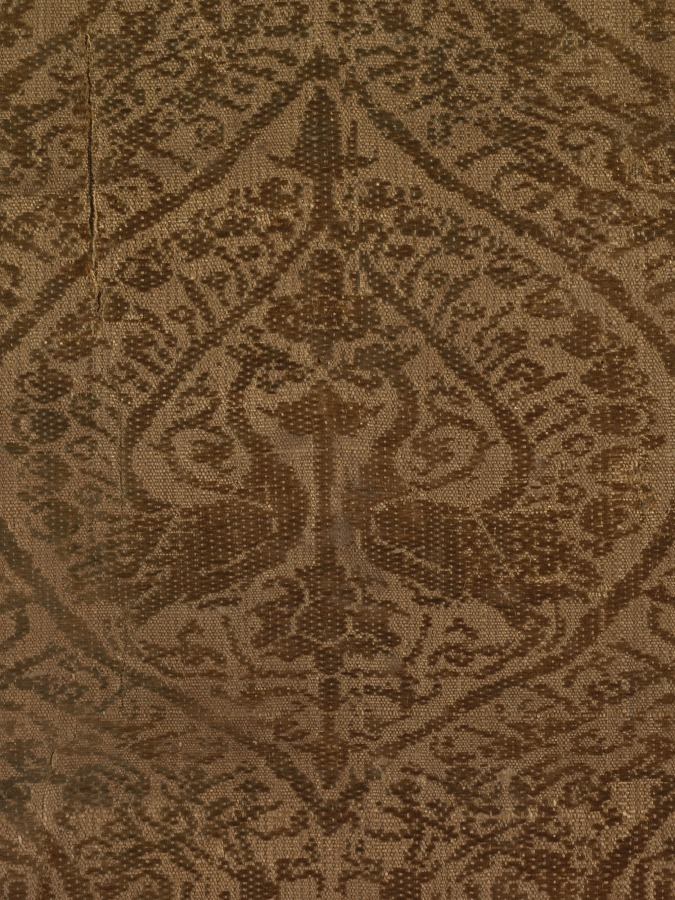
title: Fragment with peacocks in ogival pattern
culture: Iran or Iraq, possibly Rayy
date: 1004–1260 (radiocarbon date, 95% probability)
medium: Silk: plain weave with supplementary weft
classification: Textile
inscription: Pseudo-Arabic decorative inscriptions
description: Neither the design nor the technique of this silk provides clues to whether it was woven in Iran or Syria. As Iran and Iraq fell to the Mongol armies during the second quarter of the 1200s, many artisans fled to Syria, taking with them the techniques and patterns with which they were familiar. The inscriptions are purely decorative.